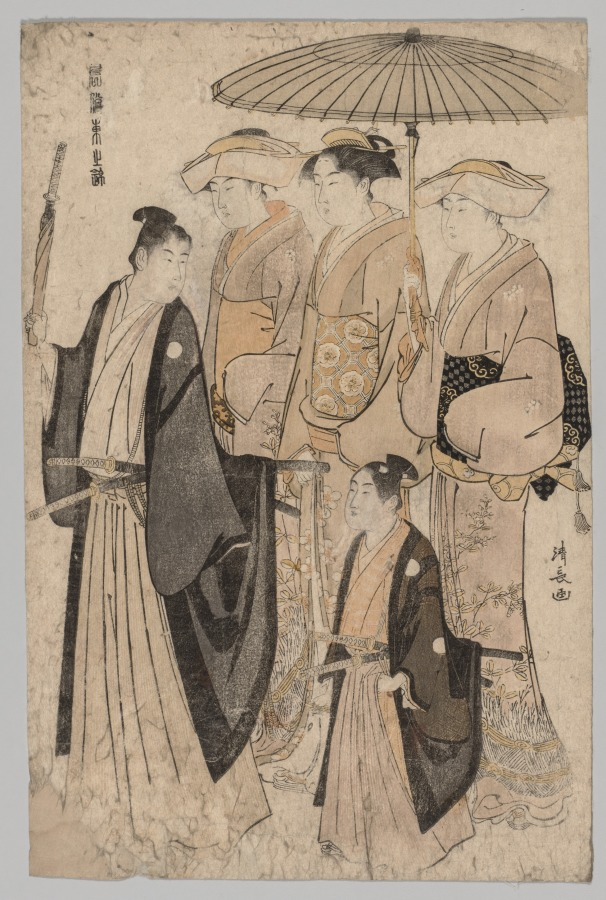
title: Woman of the Yoshiwara and Attendants (from the series Brocades of the East in Fashion)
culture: Japan, Edo period (1615–1868)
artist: Torii Kiyonaga (Japanese, 1752–1815)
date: 1752–1815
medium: color woodblock print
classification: Print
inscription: Signature: Kiyonaga gwa